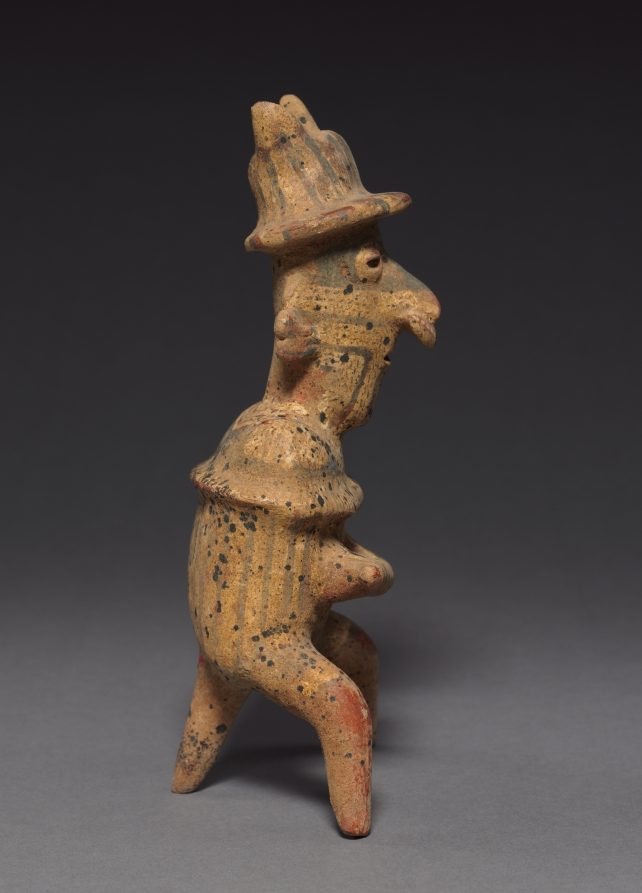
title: Seated Male Holding Chief’s Baton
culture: Mesoamerica, West Mexico, Nayarit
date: 200 BCE–300 CE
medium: ceramic, pigment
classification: Ceramic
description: The ancient artists of West Mexico specialized in ceramic sculptures in a range of sizes, investing their creations with a warm humanity regardless of scale. This tripod-shaped figure represents a well-dressed chief holding a baton of authority.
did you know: This tripod-shaped figure represents a well-dressed chief holding a baton of authority.